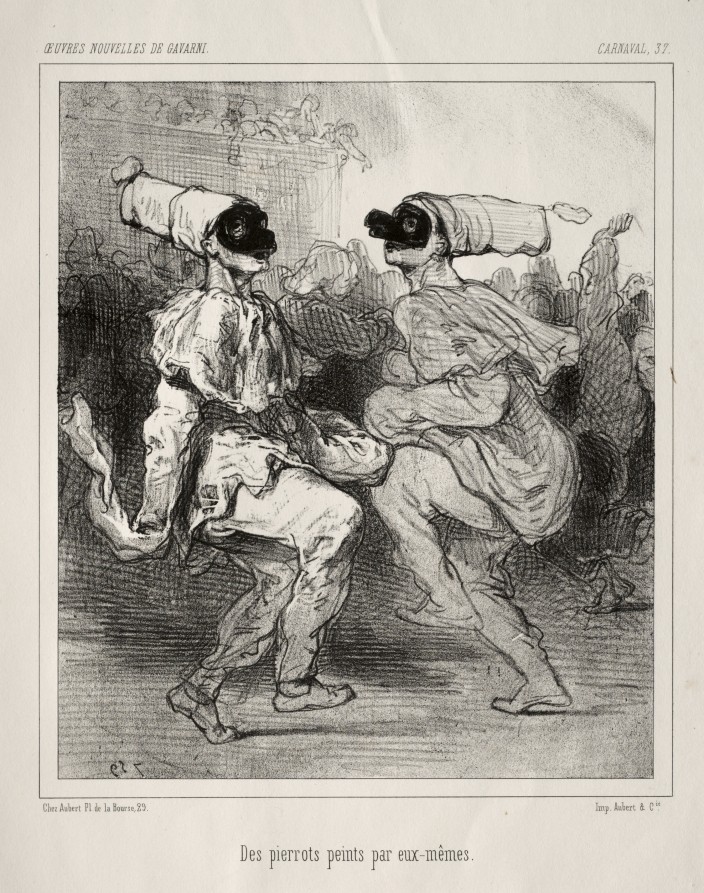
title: Carnaval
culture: France, 19th century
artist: Paul Gavarni (French, 1804–1866)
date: c. 1841–47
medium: lithograph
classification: Print